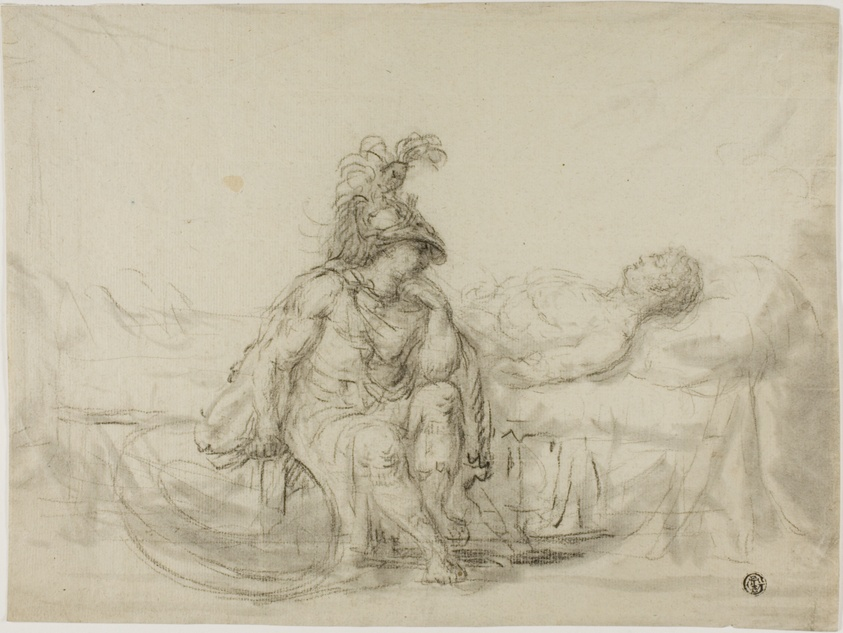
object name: Drawing and Watercolor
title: Achilles Mourning Patroclum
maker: Unknown Artist; French or Italian, n.d.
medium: Black chalk on gray laid paper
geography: France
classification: charcoal; drawings (visual works); prints and drawing